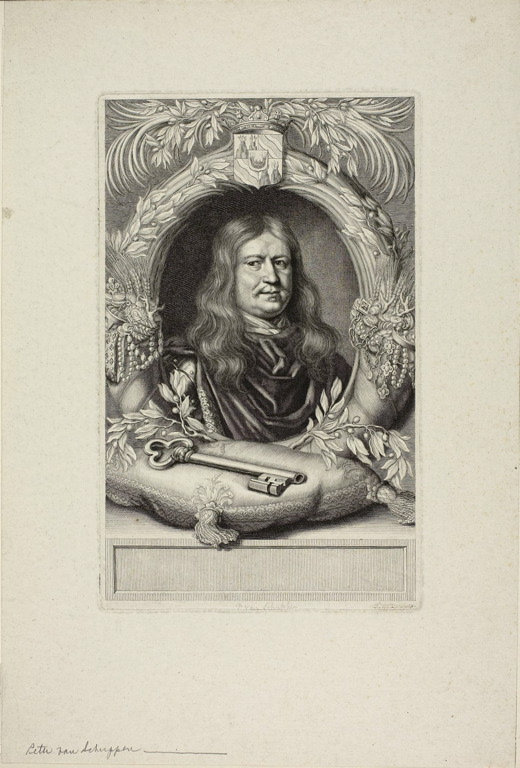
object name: Print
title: Portrait of a Man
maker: Pierre Louis van Schuppen (Flemish, 1627-1702)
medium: Engraving on paper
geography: Flanders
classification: print; prints and drawing